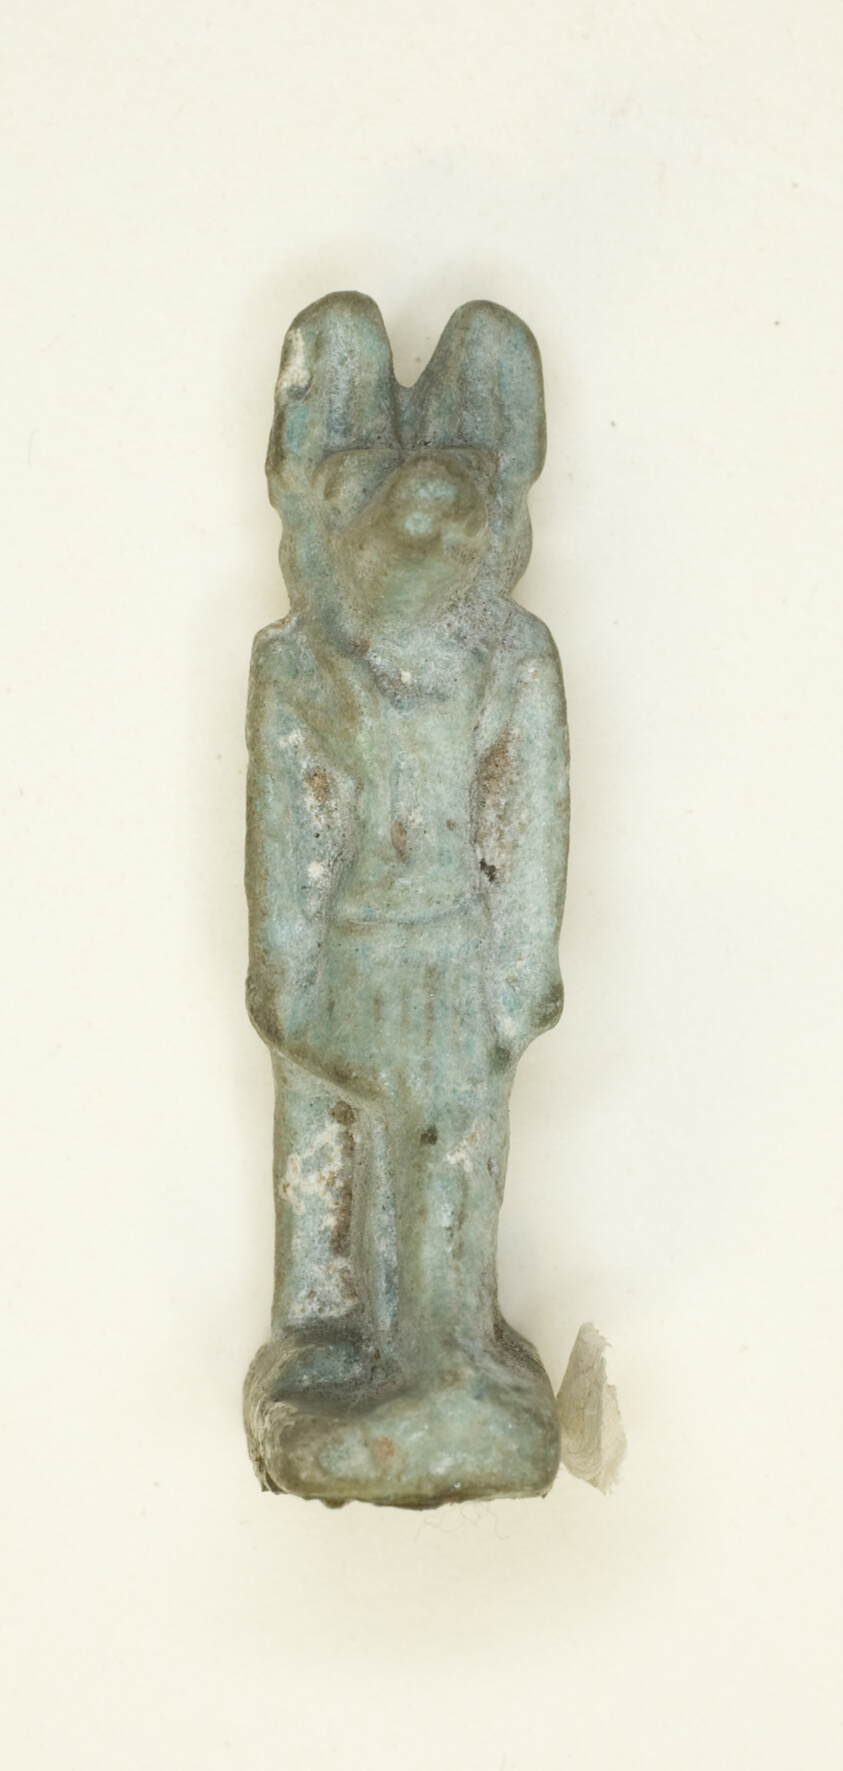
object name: Costume and Accessories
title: Amulet of the God Anubis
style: egyptian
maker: Egyptian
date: Late Period, Dynasties 26–31 (664–332 BCE)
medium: Faience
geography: Egypt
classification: amulet; jewelry; ceramics; ancient art; costume; faïence (composite material)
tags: gods (deities)